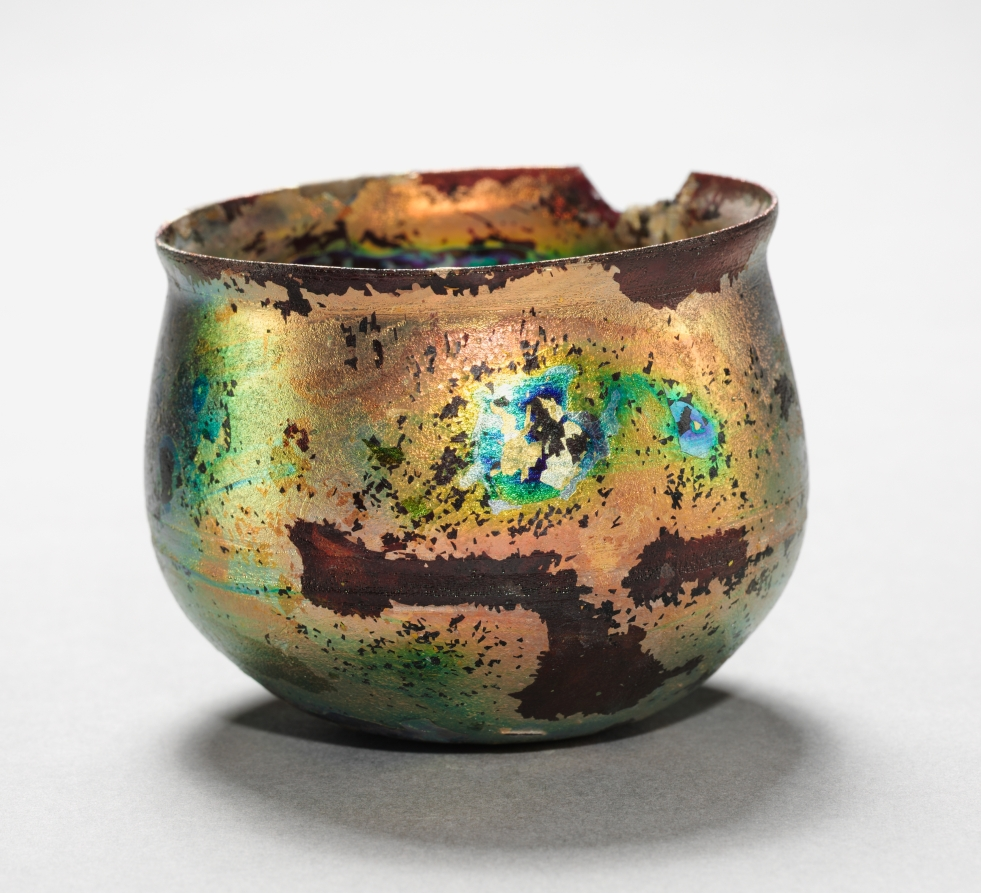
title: Goblet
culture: Italy, Roman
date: 100–300 CE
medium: glass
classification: Glass